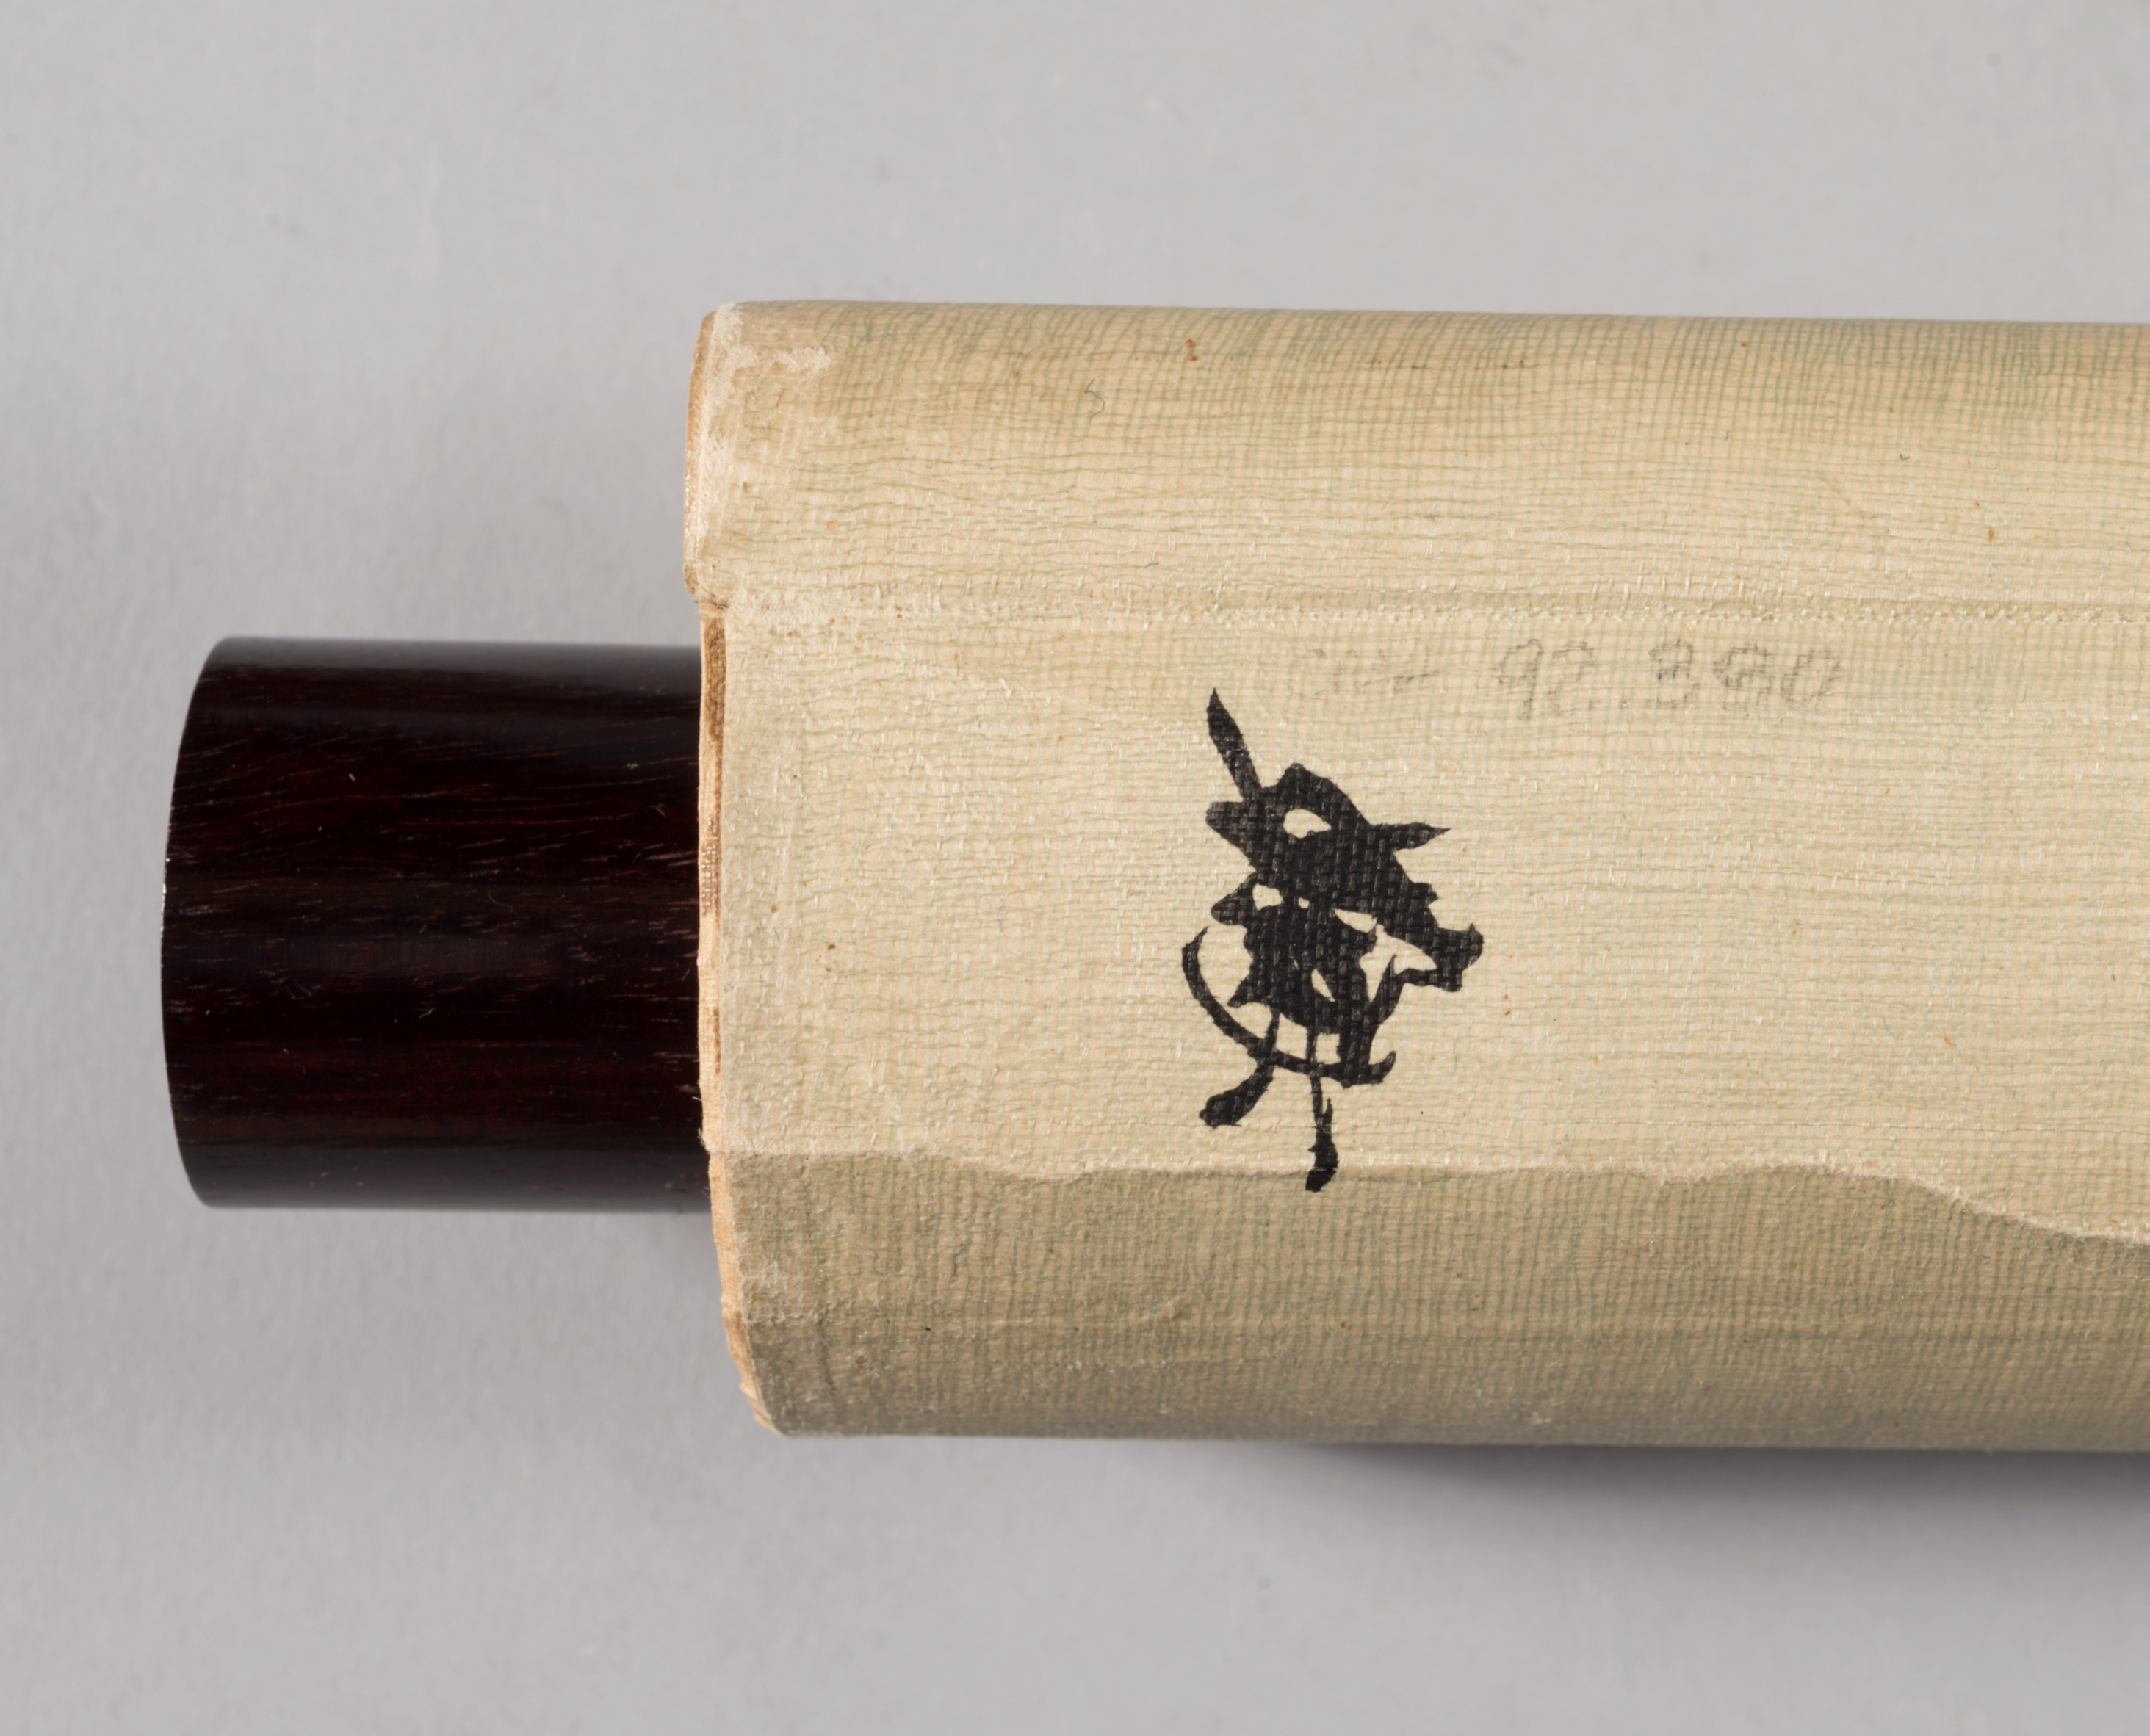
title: Summer Flowers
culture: Japan, Edo period (1615–1868)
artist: Kitagawa Sōsetsu (Japanese, active 1639–50)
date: mid-1600s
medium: hanging scroll; ink, color, and gold on paper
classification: Painting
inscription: 法橋相説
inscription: Seal: 印年 (Inen)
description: White hydrangea, orange-colored demon’s lantern, and greenbrier vine appear together in this scroll. The artist used the dripping-in (tarashikomi) technique to create a sense of depth and dimension in the leaves of the plants. A carefully controlled brush loaded with a high ratio of water to ink or color is key to the success of this brush method. Gold lines indicate the veins of leaves and the seams of pods.